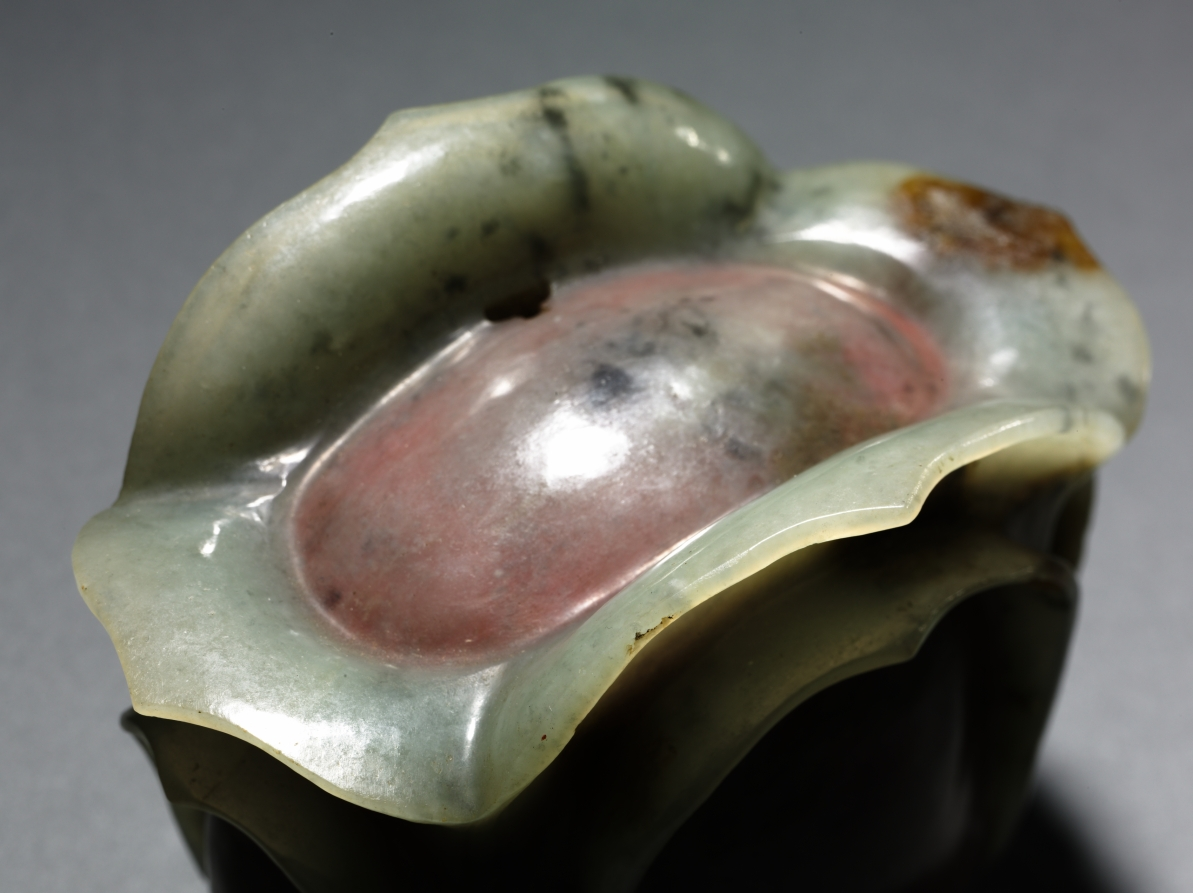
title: Daoist Cap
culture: China, Song dynasty (960-1279) - Yuan dynasty (1271-1368)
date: 960–1279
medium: grayish-green jade with brown and black markings; interior with pink pigment and gold inlays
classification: Jade